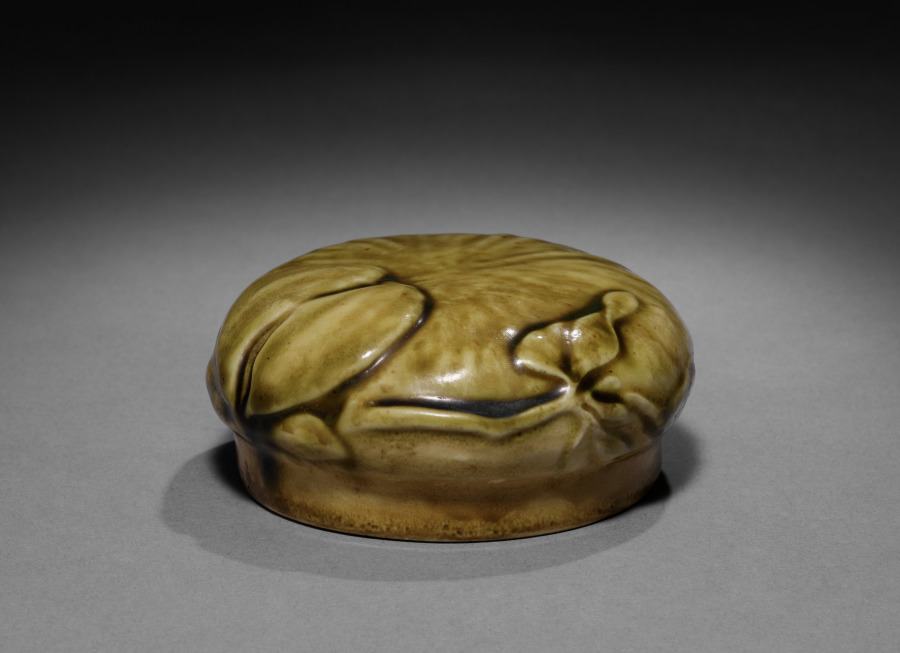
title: Ginger Jar Cover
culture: America, New York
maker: Tiffany Studios (United States, New York, 1902–32)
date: c. 1904–14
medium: glazed white clay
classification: Ceramic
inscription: LCT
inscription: Tiffany Favrile Pottery P413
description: By 1900 Louis Comfort Tiffany had expanded his empire by increasing the firm’s production of “fancy goods,” including inkstands, candlesticks, clocks, small boxes, desk sets, tea screens, and other functional objects. Along with the array of artistic glass designs from his factory in Corona, Queens, works in ceramic, bronze, other metals, and even jewelry abounded. These smaller, more affordable luxury items were designed with as much thought to artistry as the great stained glass windows and lamps through which the firm enjoyed unrivaled success.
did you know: Ceramic works were Louis Comfort Tiffany's contribution to the art pottery movement of the early 1900s.